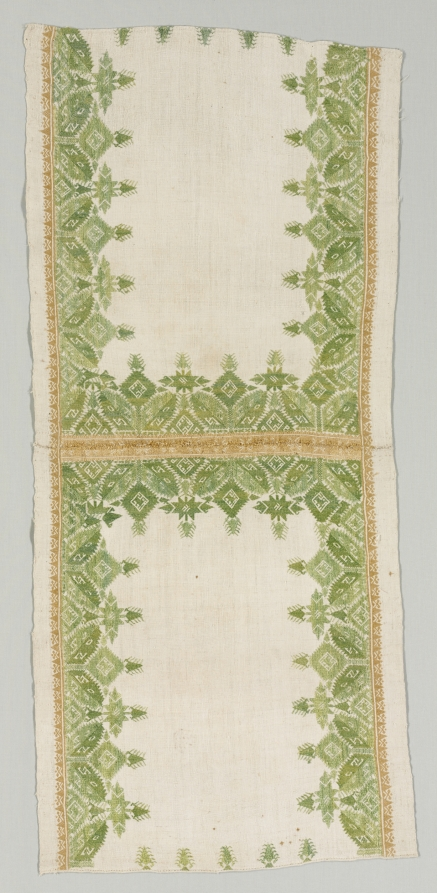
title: Pillow Cover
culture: Greece, Cyclades Islands, Amorgos, 18th century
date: 1700s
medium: embroidery; silk and gold filé on linen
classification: Embroidery